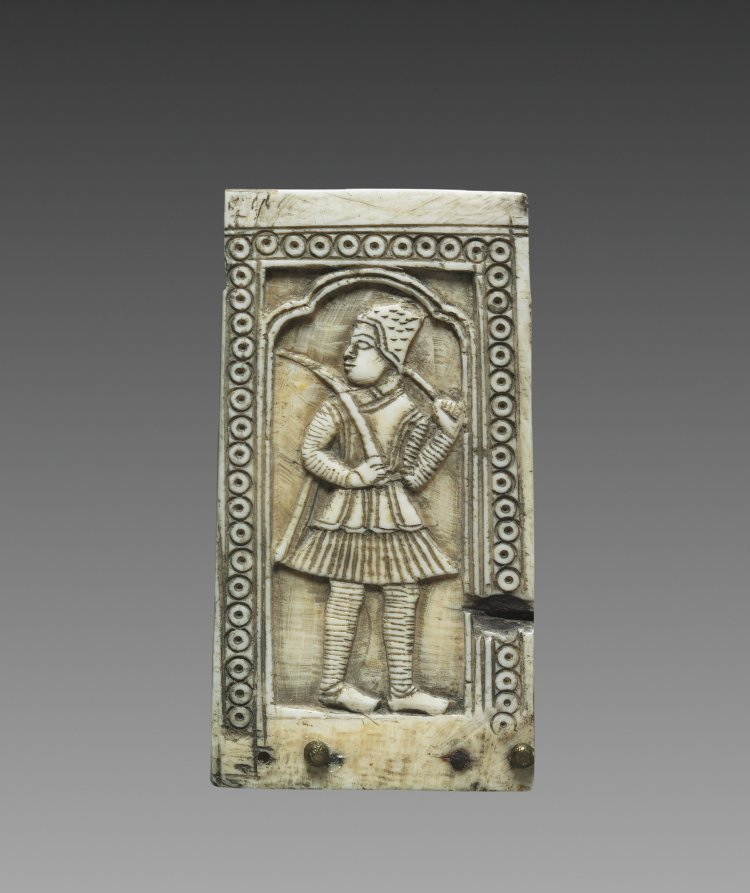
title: Panel from a Box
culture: India, North East Deccan, Visakhapatnam district, Mughal Dynasty (1526-1756)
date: c. 1700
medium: ivory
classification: Ivory